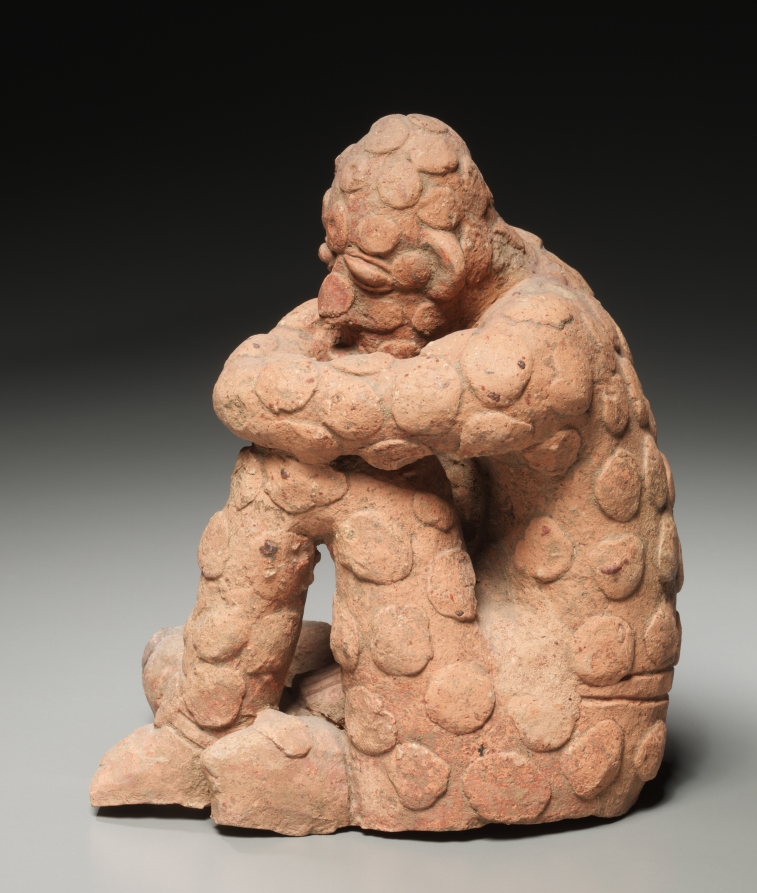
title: Male Figure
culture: Africa, West Africa, Mali, probably Djenné-Djenno, Inland Niger Delta culture-style maker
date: possibly 1300s–1600s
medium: Terracotta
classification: Sculpture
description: Figures like this would have been used in rituals by the ancestors of the present-day inhabitants of the Inland Niger Delta. Representing the gods and kings or queens associated with the region’s former residents, the figures received prayers and offerings in exchange for their support. The seated position of this male has been interpreted as a harmful pose intended to bring death to an individual.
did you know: While we don’t know who made this work, it can be hypothesized that it was a woman; today, as in much of Africa, potters in Mali are female.